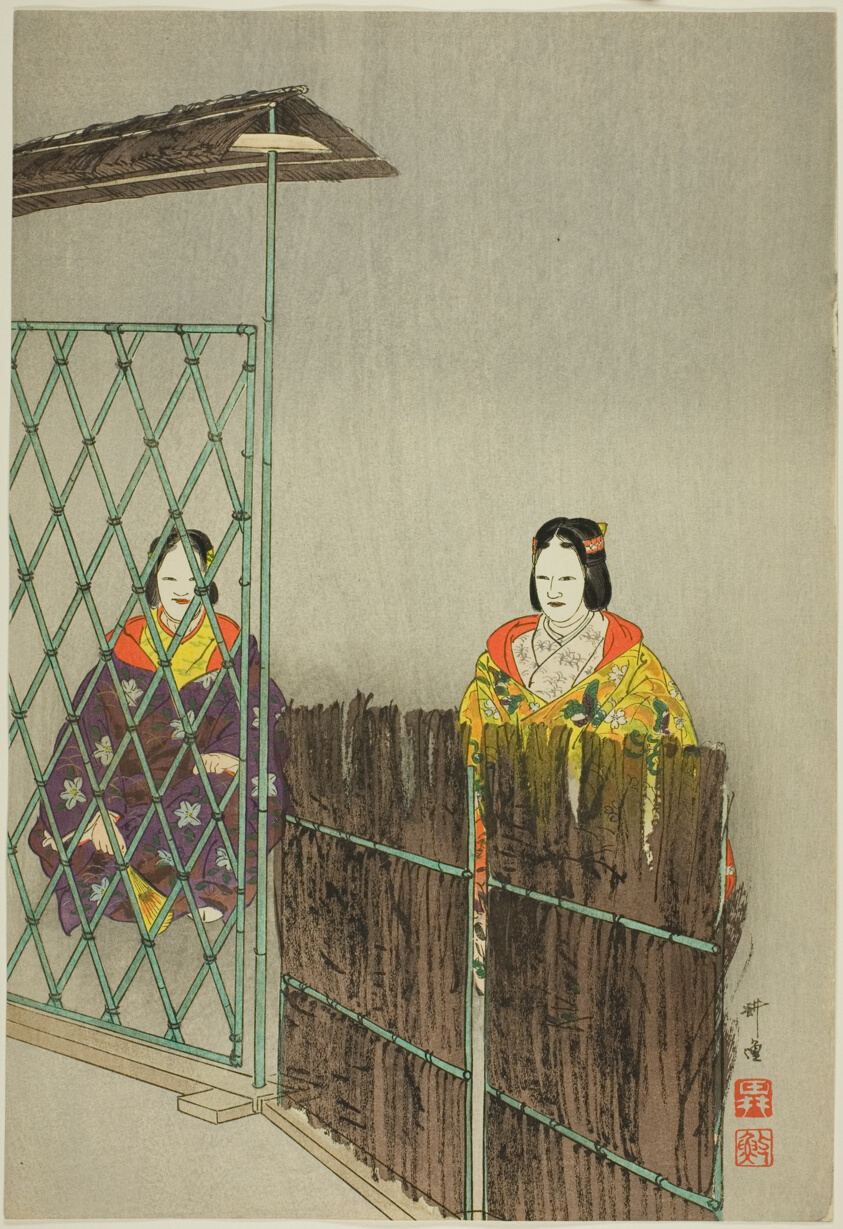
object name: Print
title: Kogo, from the series "One Hundred No Dramas (Nogaku hyakuban)"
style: Japanese (culture or style)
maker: Tsukioka Kogyo; Japanese, 1869-1927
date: 1898/1903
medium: Color woodblock print; right sheet of oban diptych (left: 1943.833.31b)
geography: Japan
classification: woodblock print; print; asian art